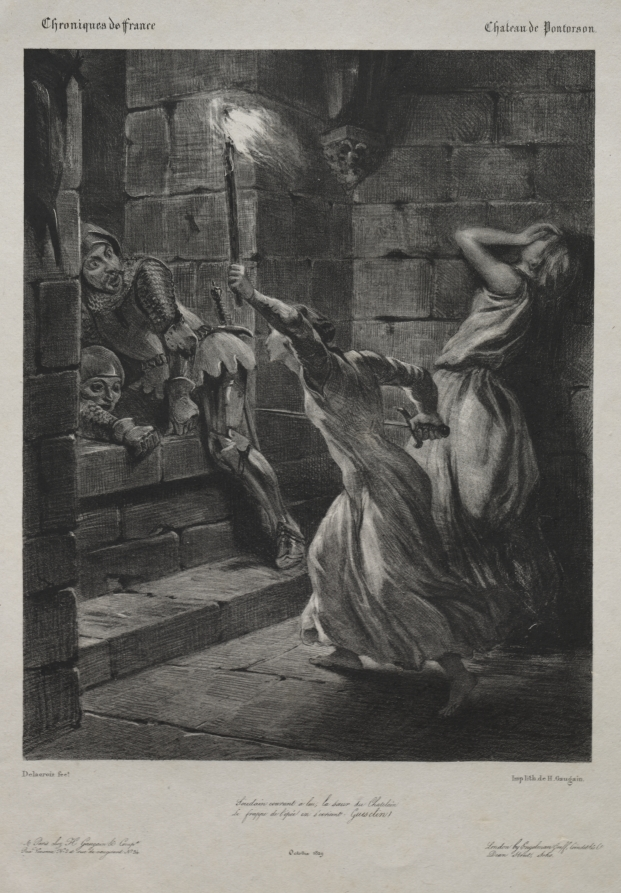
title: The Sister of Duguesclin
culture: France, 19th century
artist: Eugène Delacroix (French, 1798–1863)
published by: H. Gaugain & Co. and Engelman Graff, Coindet & Co.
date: 1829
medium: lithograph with chine collé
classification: Print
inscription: upper left, printed: Chroniques de France; upper right, printed: Chateau de Pontorson; lower left margin, printed: Delacroix fect.; lower right margin, printed: Imp. lith de H. Gaugain; lower left margin, printed: A Paris chez H. Gaugain & Compe / Rue Vivienne No. 2 et rue vaugirard; lower center margin, printed: Octobre 1829; lower right margin, printed: London by Engleman Graff, Coindet & Co. / Dean Street, Soho